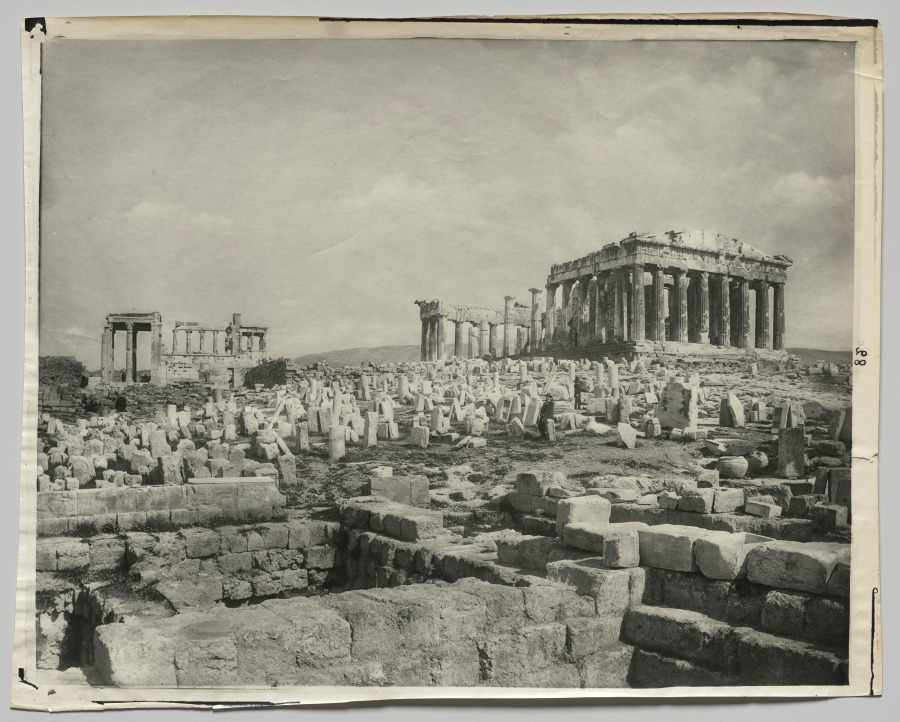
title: View of the Parthenon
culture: France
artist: Adolphe Braun & Co. (French, 1845–1894)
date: c. 1880s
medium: mammoth carbon print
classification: Photograph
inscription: Number imprinted on recto, right margin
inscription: Written in pencil on verso: "82"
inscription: Written in pencil on verso: "Parthénon"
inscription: Written in pencil on verso: "D"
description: Adolphe marketed his photos of flowers, artworks, landscapes, and monuments from across Europe throughout that continent and in North America. The Acropolis of Athens, the most famous ancient Greek site, must have sold well; Braun offered multiple views of it. The image on a carbon print is formed from pigmented gelatin, which is far more resistant to fading than the silver or metal salts in silver-based prints.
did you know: Carbon prints are among the stable and long-lasting photographic processes.